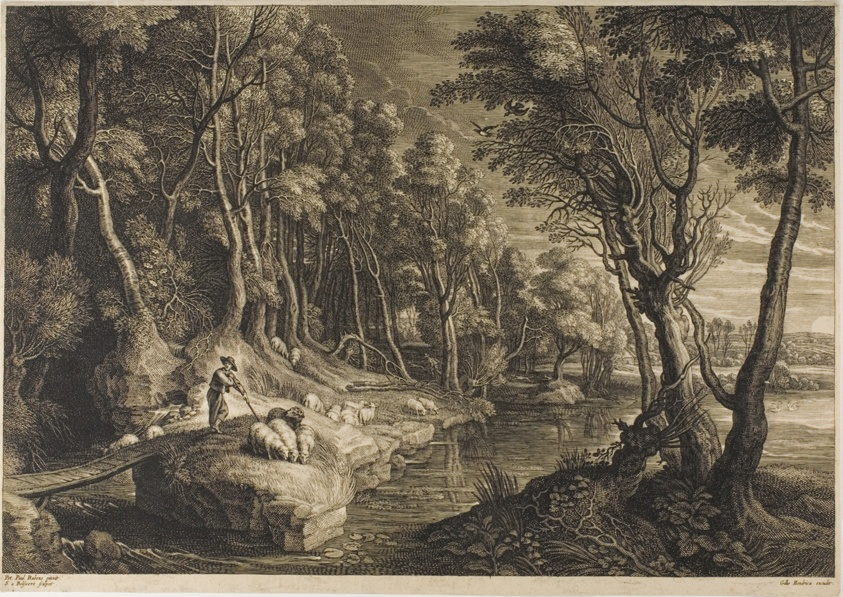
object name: Print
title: Forest Crossed by a Stream, from The Small Landscapes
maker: Schelte Adamsz. Bolswert (Dutch, active in Flanders, c. 1586–1659); after Peter Paul Rubens (Flemish, c. 1577-1640)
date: c. 1638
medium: Engraving on cream laid paper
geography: Flanders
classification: engraving; print; prints and drawing